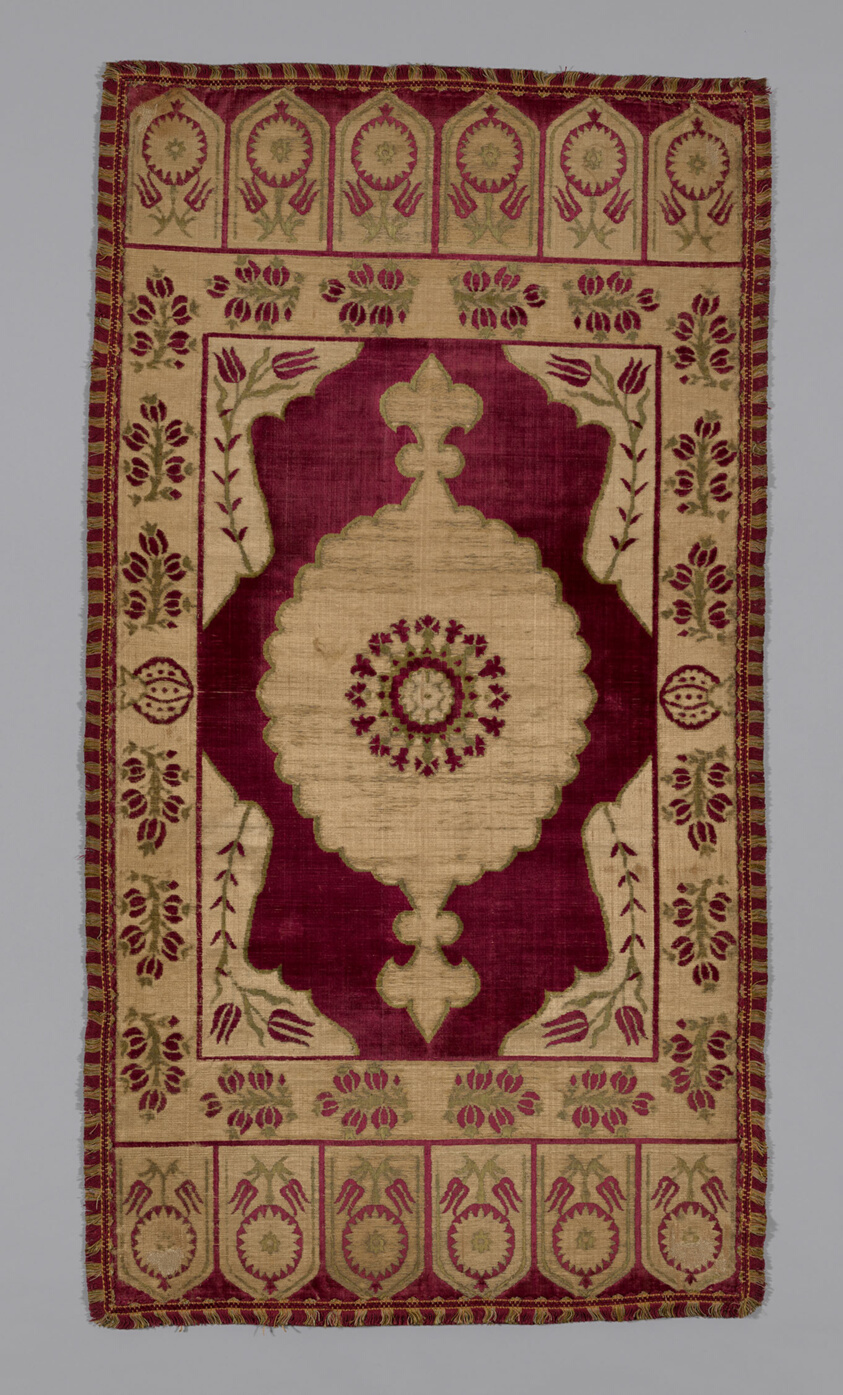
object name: Textile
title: Cushion Cover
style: turkish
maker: Turkey, Bursa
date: 17th century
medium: Silk and cotton, satin weave with supplementary facing wefts, supplementary binding wefts, and two-color cut voided velvet; edged with woven fringe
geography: Turkey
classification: textile; weaving - velvet